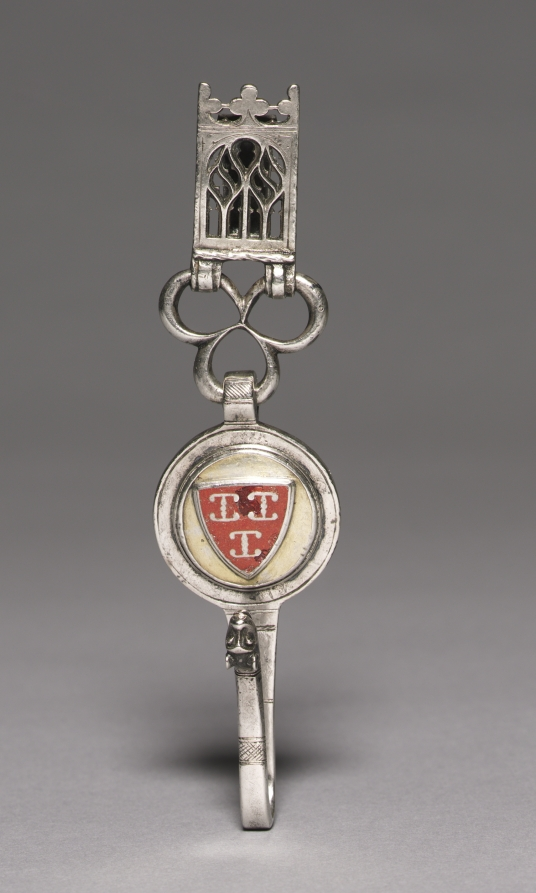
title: Clavendier (Belt Hook)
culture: Netherlands, Gothic period, late 14th century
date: c. 1400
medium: silver, gilded silver, champlevé enamel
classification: Metalwork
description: This object allowed a purse (carried by both sexes) or keys to be suspended from the belt. It bears the enameled coat of arms of the family of Zuylen (van) d’Anholt.